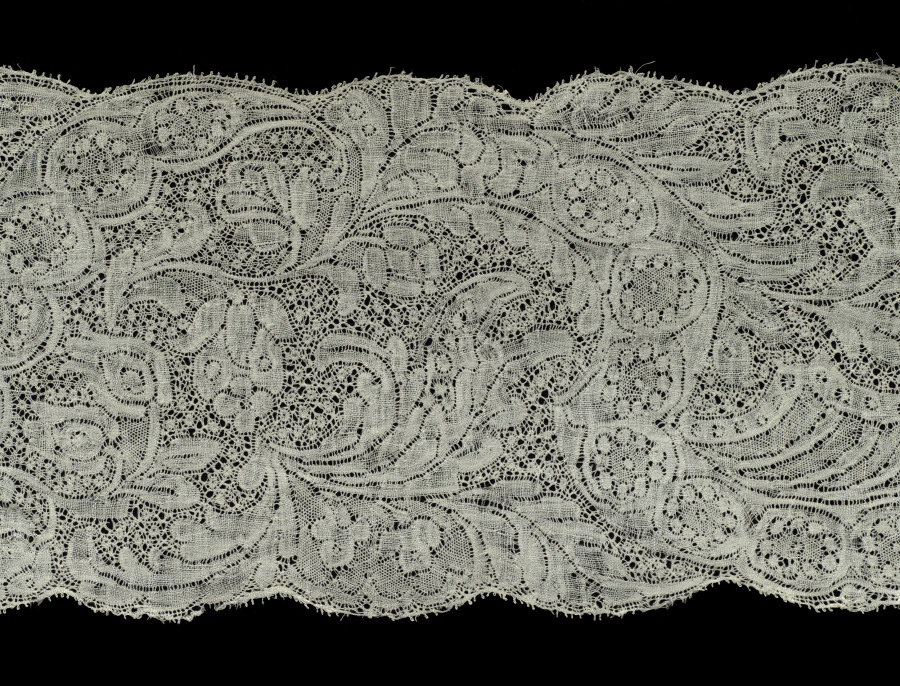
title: Lace Lappet (one of a pair)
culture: Belgium, Binche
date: 1700s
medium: Linen: bobbin lace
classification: Lace